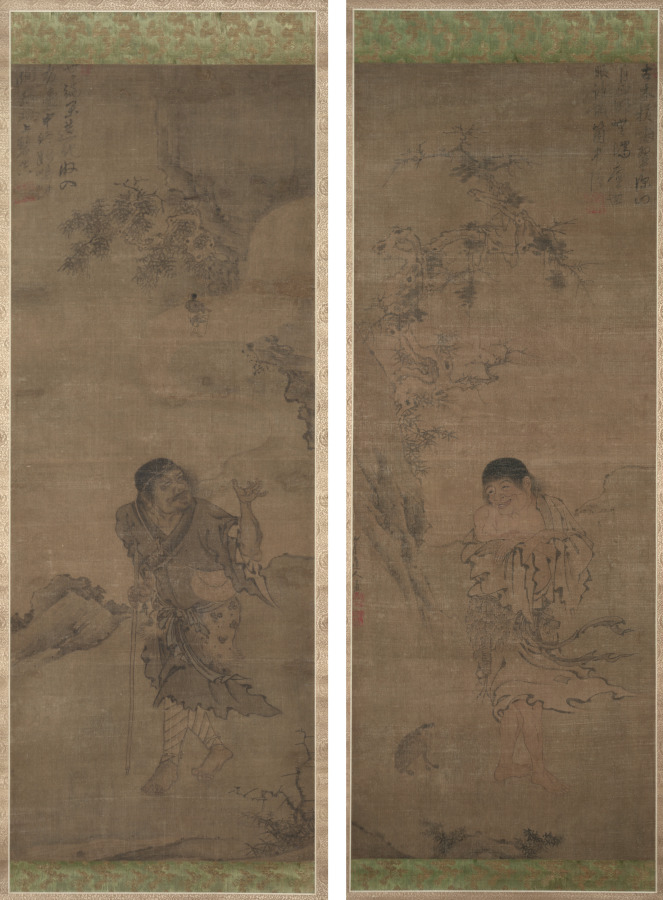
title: Li Tieguai; Liu Haichan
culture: China, Yuan dynasty (1271-1368)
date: 1300s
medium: Pair of hanging scrolls; ink and color on silk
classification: Painting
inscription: Li Tieguai painting inscribed in the upper left corner: The universe which has no limit/ Is all collected in the cloth bag/ At the roadside which has no beginning or end/ One floats up to the blue sky.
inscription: Liu Haichan painting inscribed in the upper right corner: The old tree has its green shrouded in mist/ In the depth of the mountain the moon is bright/ By no means could the eyes of the dusty world/ Understand these particular feelings. Shan-yüeh tao-jen. [seal] Shan-yüeh (?)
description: This pair of hanging scrolls show the Daoist immortals Li Tieguai and Liu Haichan. It is said that Li Tieguai’s ethereal self visited the deified Laozi but when he returned, he found that his own body was burned. He had to inhabit the corpse of a person who used a crutch to walk, and thus gained his name Tieguai—the Iron Crutch. The painting depicts Li Tieguai after he took possession of the body, with the iron staff in his hand. As Li exhales, he blows a small Li Tieguai in the air, showing the immortal’s ability to send his spirit on journeys. Liu Haichan is often shown as a young man wearing bangs across his forehead. He was said to have lived during the Five Dynasties period (907–979) and left his position as a grand councilor to become a hermit. Usually depicted carrying a string of coins and accompanied by a three-legged toad, Liu Haichan became a god of wealth and his toad symbolizes wealth as well. In this scroll, Liu is teasing the three-legged toad with a string of coins tied to his waist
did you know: Li Tieguai walks with an iron crutch, while Liu Haichan is depicted with a three-legged frog.